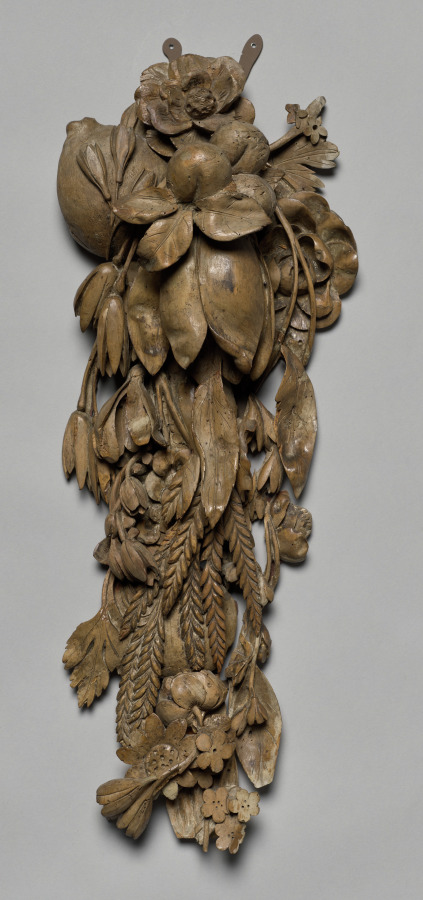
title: Carving from an Overmantel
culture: England, 17th century (Charles II)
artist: Grinling Gibbons (British, 1648–1721)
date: c. 1675–1677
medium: lindenwood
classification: Sculpture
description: The arrangement of architectural elements within grand interior spaces in the late 1600s and early 1700s emphasized symmetry and height. Decorative elements such as elaborately carved mantels, mirrors, paintings, and applied wall decorations were often stacked to achieve a visual focal point at one or both ends of the room. This particular overmantel decoration once hung above the fireplace in the Green Drawing Room of the Earl of Essex at Cassiobury in Watford, near London. In 1823, the British painter William Henry Hunt (1790–1864) produced a watercolor of the drawing room which featured this overmantel decoration. Grinling Gibbons was born in Rotterdam, the Netherlands, of English parents. After training there as an artist, he came to England in the 1660s and soon began to work as a sculptor of interior ornament, particularly in wood. One of his first large-scale decorative projects was the series of interiors at Cassiobury House.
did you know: The swags of fruit and foliage featured in this wooden overmantel decoration evoke the bounty of the English countryside.